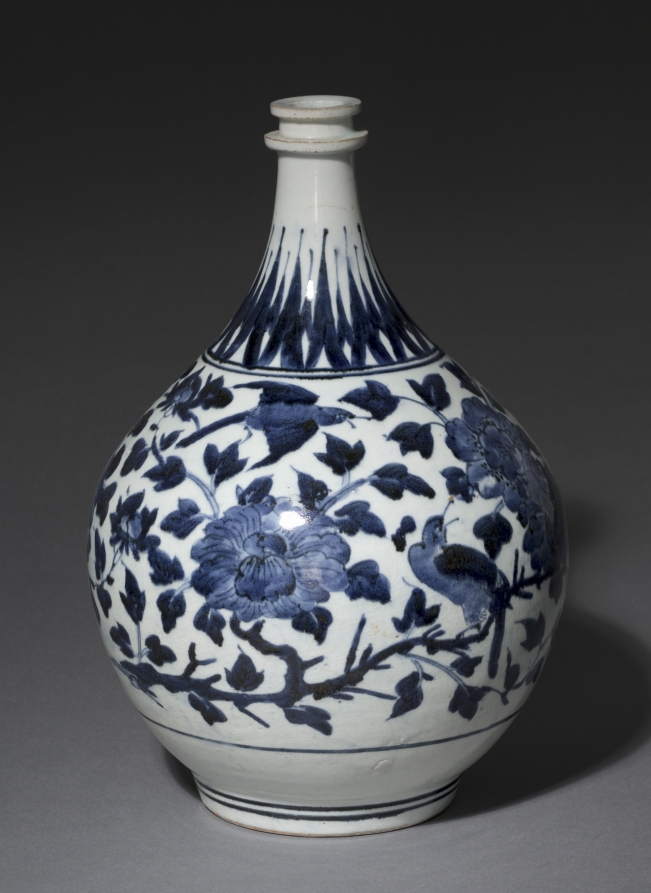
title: Medicine Bottle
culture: Japan, Edo period (1615–1868)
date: 1670s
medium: porcelain with underglaze blue decoration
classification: Ceramic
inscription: "I.C." on bottom (probably made for Joannes Camphuys, 1634–1695).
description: While inspired by medicine jars used in European pharmacies, this bottle was likely decorative. It may have been exported by the Dutch East India Company, a powerful trading company from the Netherlands. In Japan, it operated from Deshima, a man-made island in Nagasaki harbor created in 1636. The initials “I. C.” appear on the base. As the letter J was often transposed with the letter I in Europe of the 1600s, some scholars believe the bottle may have been made for Johannes Camphuys (1634–1695), who was in charge of the Dutch East India Company’s operations in Deshima in 1671.